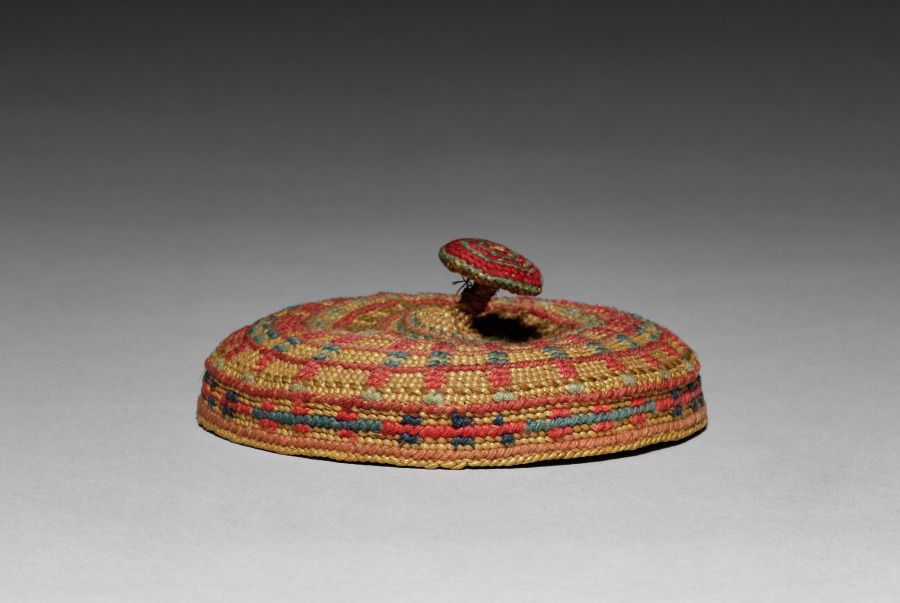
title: Cover for a Basket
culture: Arctic, Aleut, late 19th-early 20th century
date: late 1800s–early 1900s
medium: wool embroidery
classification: Basketry